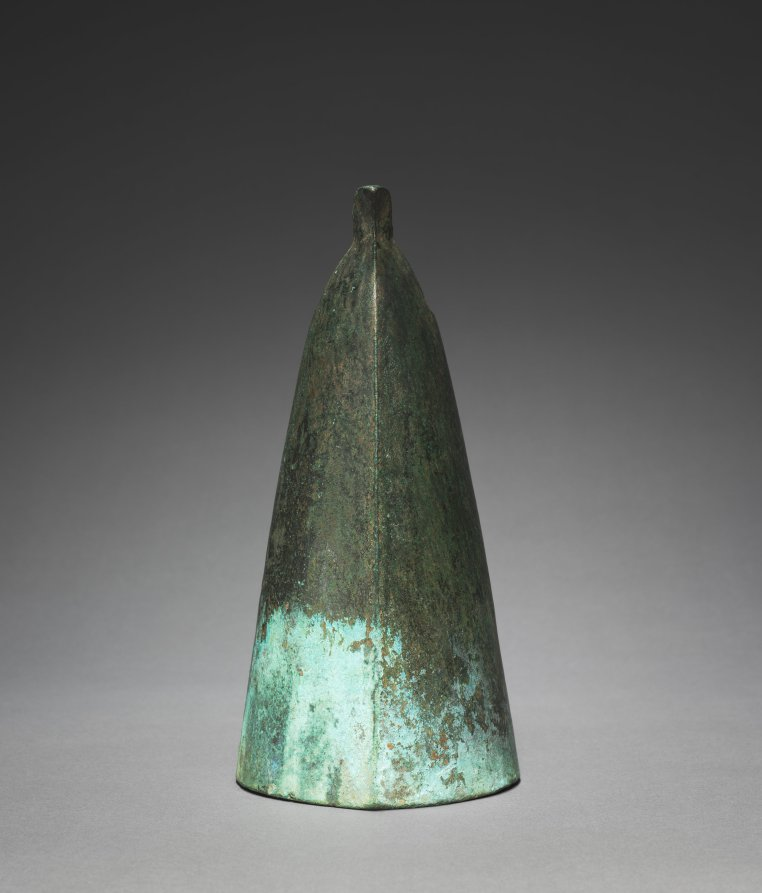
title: Bell with Diamond-Shaped Insignia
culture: China, along the southern borders, Eastern Zhou dynasty (770–256 BCE) to Han dynasty (202 BCE–220 CE)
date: 300s–100s BCE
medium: bronze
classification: Metalwork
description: These rare, elegant bronze bells were made in a tribal village along the southern borders of China. They differ greatly from bells made in the central regions, which often come in large sets and in varying sizes, and feature complex decorative patterns. The distinctive shape of these bells resembles a tall helmet topped by a pair of horns. A rope may have been tied around the horns so that the bells could be suspended. Each bell is decorated with a diamond-shaped insignia—probably to mark tribal affiliation. Although the bells are identical in size, each produces a different tone, which indicates that their casting was a highly refined process.